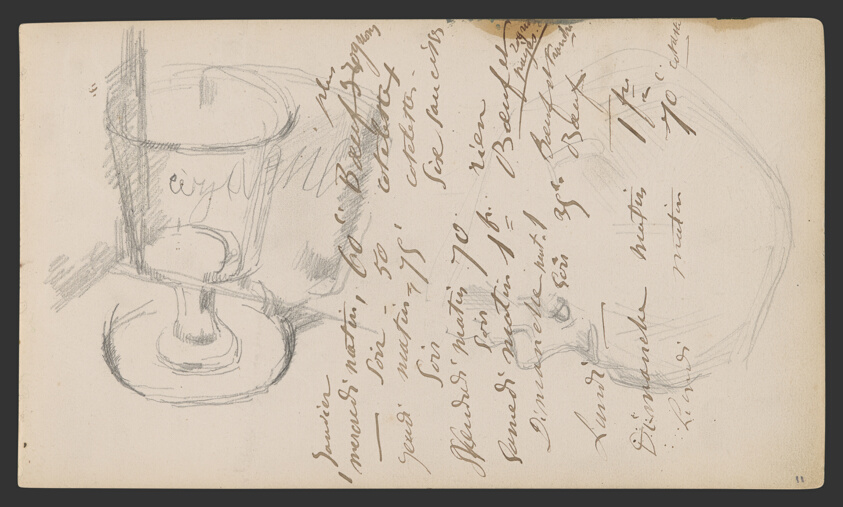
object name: Drawing and Watercolor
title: Sketchbook No. 2 (L'Estaque)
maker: Paul Cézanne; French, 1839-1906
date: 1875–86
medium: Graphite and pen and ink drawings on paper, bound into a book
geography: France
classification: sketchbook; graphite; prints and drawing; paper